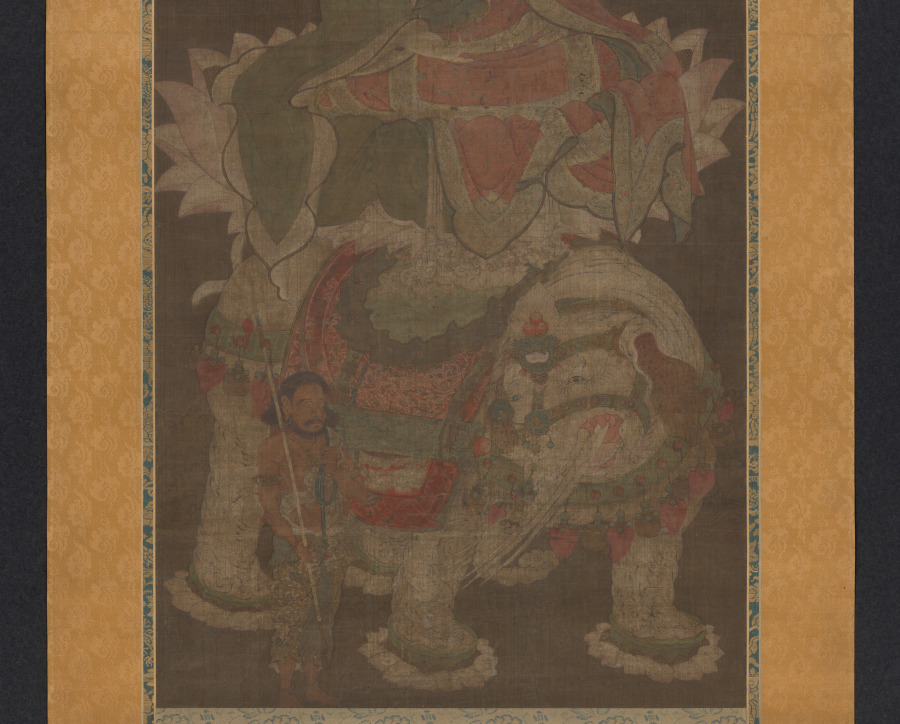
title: Samantabhadra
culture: China, Southern Song dynasty (1127-1279)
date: 1100s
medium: hanging scroll; ink and color on silk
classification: Painting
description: In the last chapter of the Lotus Sutra, one of the principal Buddhist texts, the great Bodhisattva Samantabhadra is described advancing to earth, riding on a six-tusked elephant, and proclaiming himself protector of the faithful. More frequently, he is shown with Bodhisattva Manjusri as the attendants of Shakyamuni (the historical Buddha). This scroll is probably the left panel in a triptych (group of three paintings) portraying these deities.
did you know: Samantabhadra holds a lotus with a sutra on top of the blossom.